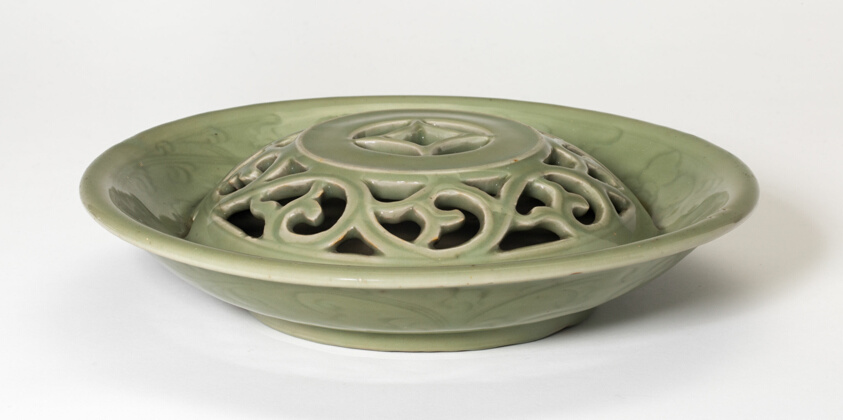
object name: Vessel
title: Dish with Openwork Dome and Floral Scrolls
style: Chinese (culture or style)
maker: China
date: Ming dynasty (1368–1664), 15th century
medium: Longquan ware; celadon-glazed stoneware with underglaze incised decoration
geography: China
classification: dish (vessel); ceramics; asian art; vessel